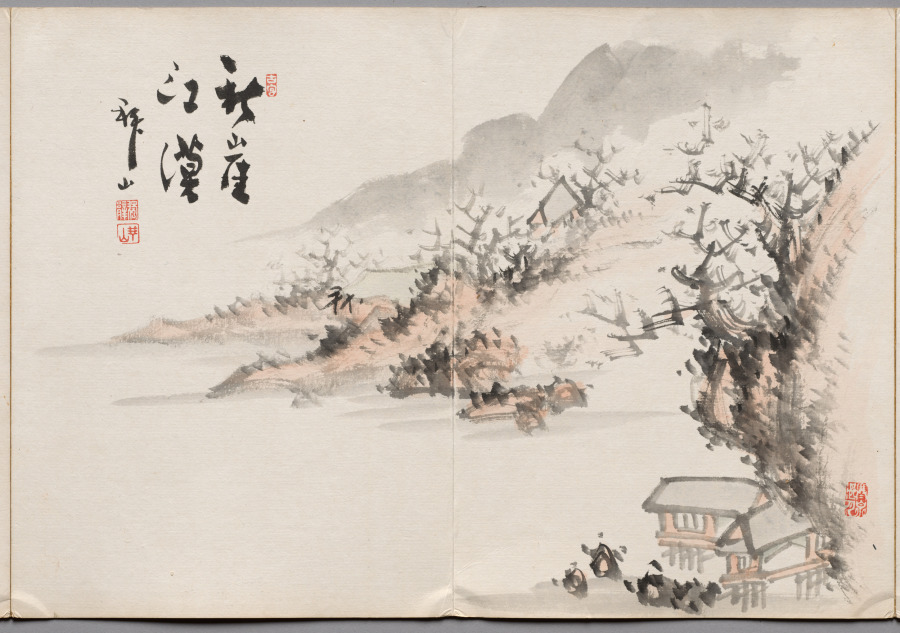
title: Painting Eleven from Album of Paintings by Haizan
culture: Japan, Meiji period (1868–1912) or Taishō period (1912–26)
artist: Yoshitsugu Haizan (Japanese, 1846–1915)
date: late 1800s–early 1900s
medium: page spread from double-sided accordion album; ink and color on paper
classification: Painting